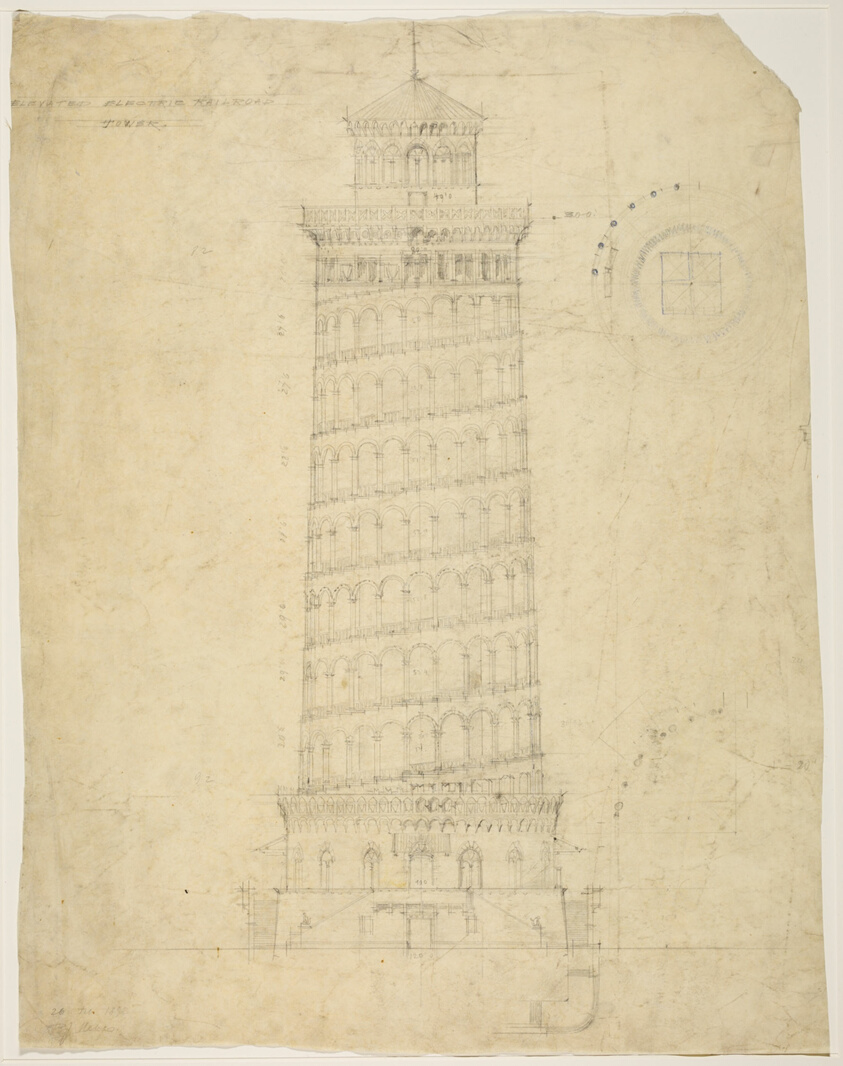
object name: Architectural Drawing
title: World's Columbian Exposition Elevated Electric Railroad Tower, Chicago, Illinois, Elevation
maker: Peter J. Weber; American, born Germany, 1863-1923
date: 1892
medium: Graphite on tracing paper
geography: Chicago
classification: architectural drawing